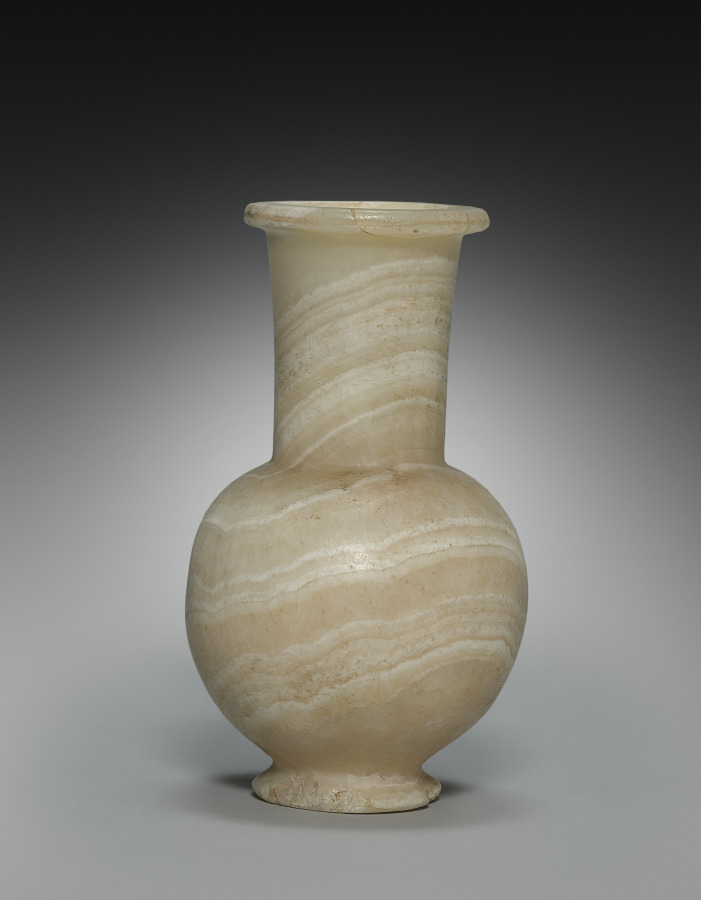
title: Long-Necked Flask with Lid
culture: Egypt, New Kingdom (1540–1069 BCE), Dynasty 18, reign of Tuthmosis III (1479–1425 BCE)–reign of Amenhotep III (1390–1352 BCE)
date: 1401–1353 BCE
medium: travertine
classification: Vessels